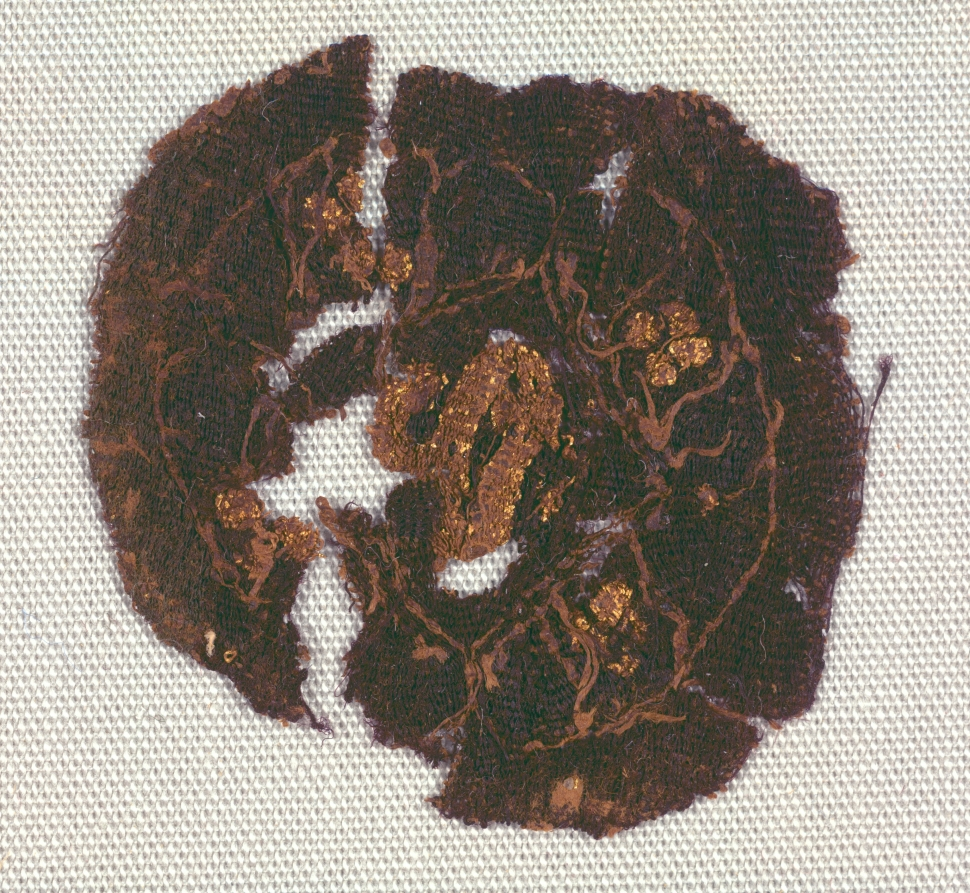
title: Round Segmentum from a Tunic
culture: Egypt, Byzantine period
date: 300s–400s CE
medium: tapestry (probably inwoven in tabby ground); wool, linen, and gold foil around silk core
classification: Textile